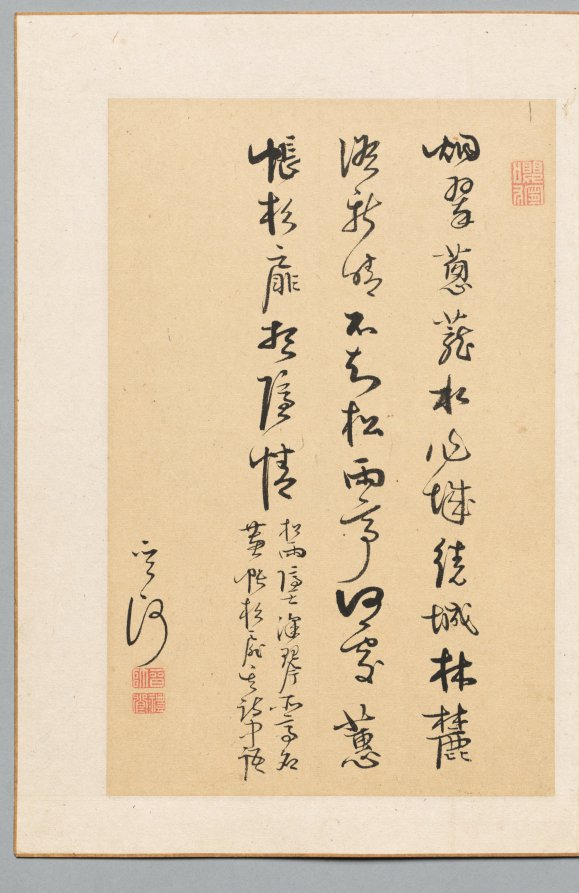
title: Calligraphy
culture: Japan, Edo period (1615–1868)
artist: Kan Sazan (Japanese, 1748–1827)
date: early to mid-1800s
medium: leaf from a pair of albums; ink and light color on paper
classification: Portfolio